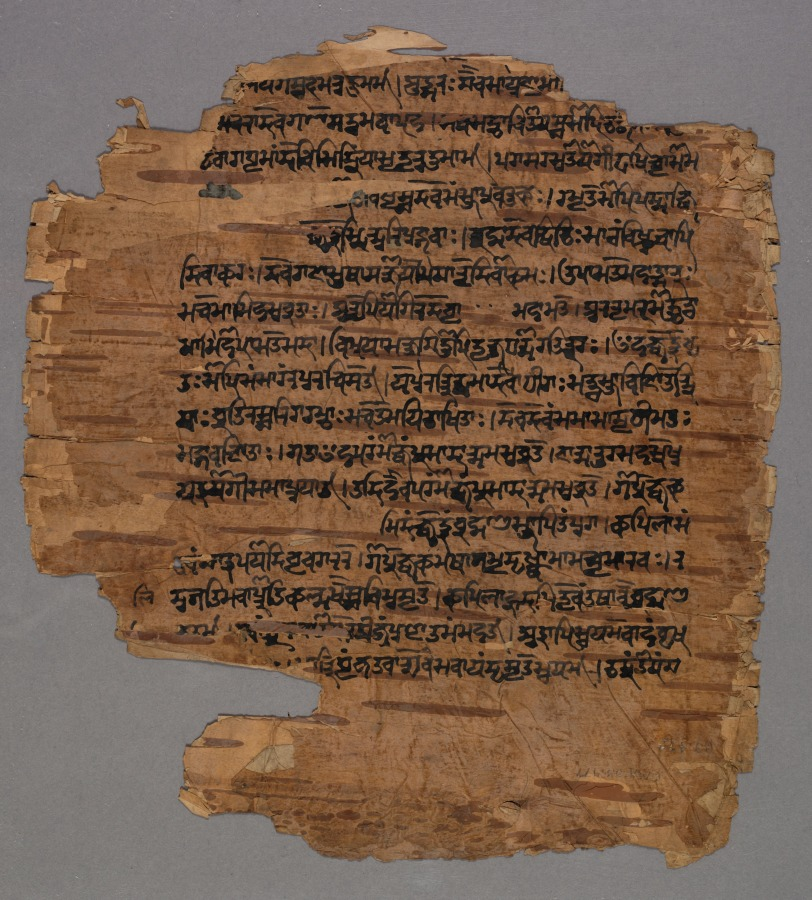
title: Sarada Script (?)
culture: India or Kashmir, probably 17th century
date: 1600s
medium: ink on paper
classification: Manuscript